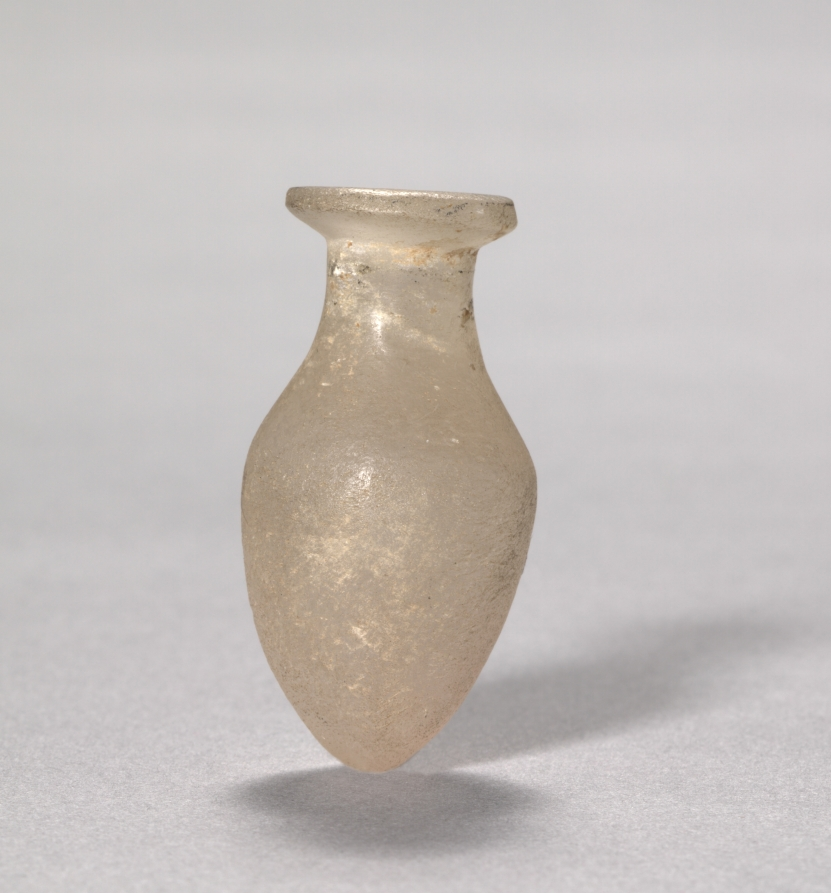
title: Magic Bottle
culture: Egypt, Old Kingdom (2647–2124 BCE), Dynasties 5–6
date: 2300–2124 BCE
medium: quartz crystal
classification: Vessels